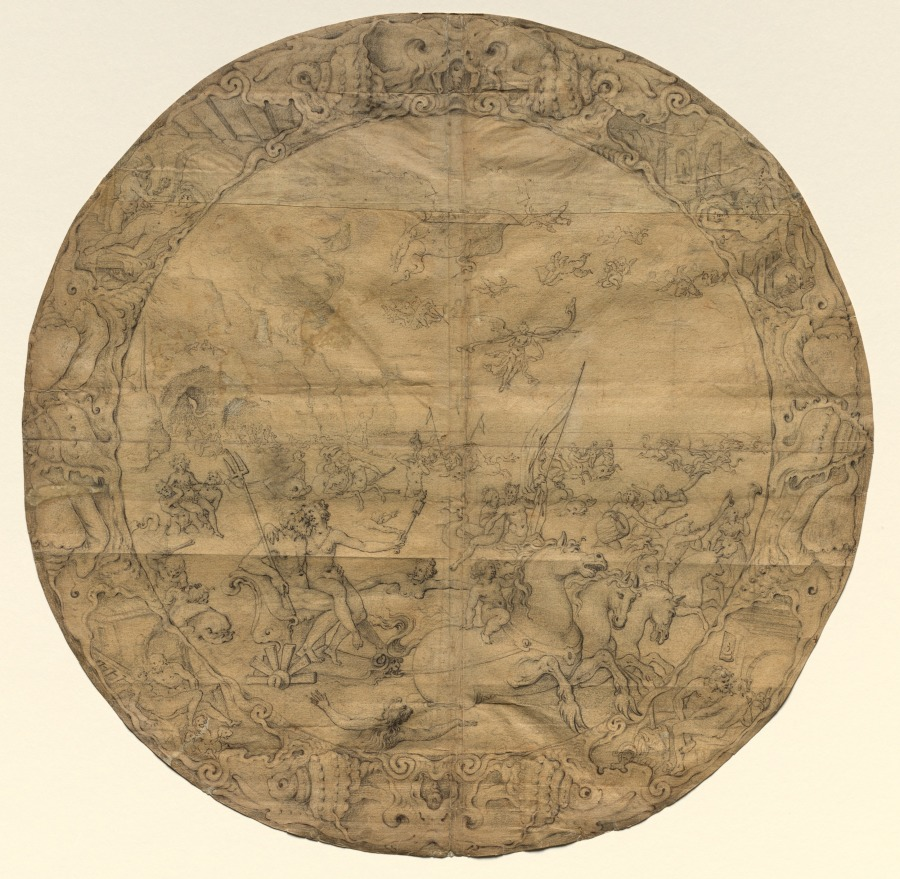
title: Design for a Standing Dish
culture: Netherlands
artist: workshop of Adam van Vianen (Dutch, 1559–1627)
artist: or Christiaen van Vianen (Dutch, c. 1600–1667)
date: c. 1625–45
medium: black chalk (stumped in places), pen and brown ink, and brush and black ink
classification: Drawing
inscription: VERSO OF SECONDARY SUPPORT, center left, in graphite: [2?] ; center right, in graphite: [illegible]ave / Natt[illegible] F[illegible]